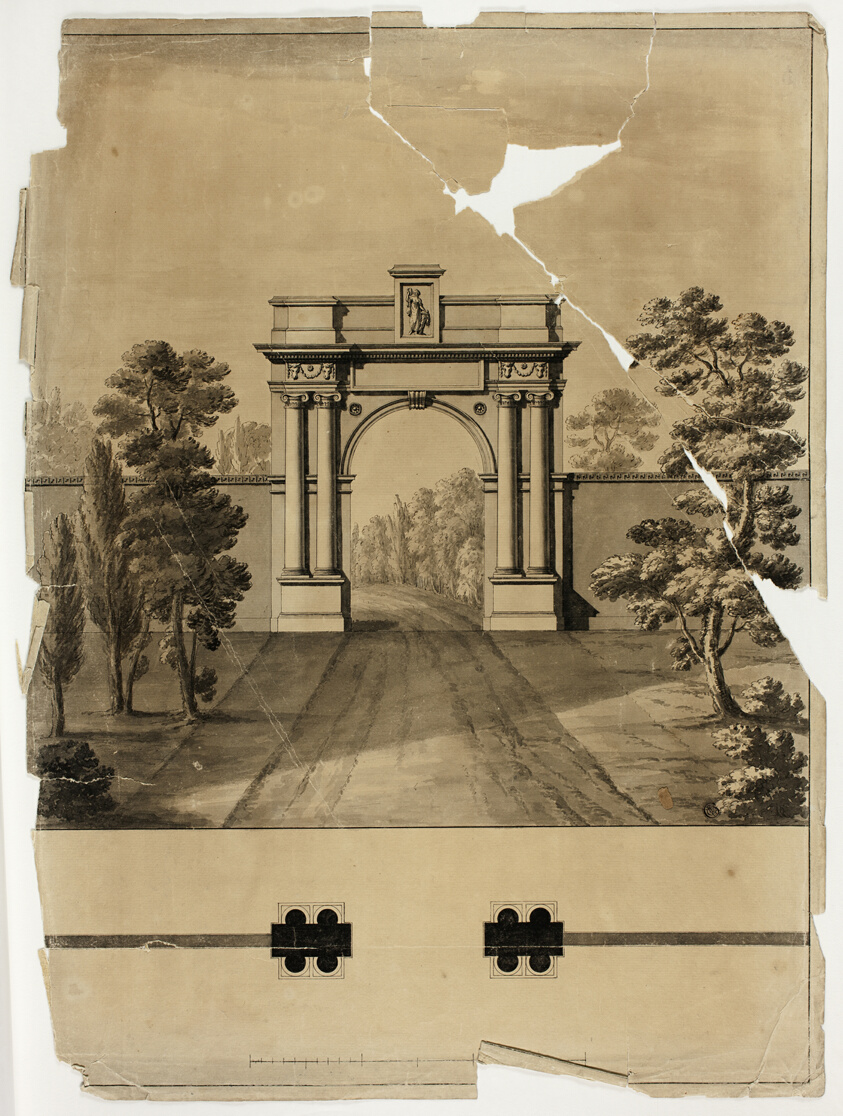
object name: Drawing and Watercolor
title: Monumental Entrance to Cemetery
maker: Attributed to James Malton; English, 1761-1803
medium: Pen and black ink and brush and gray wash on tan laid paper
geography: England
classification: pen and ink drawings; paper; brush and wash; drawings (visual works); prints and drawing